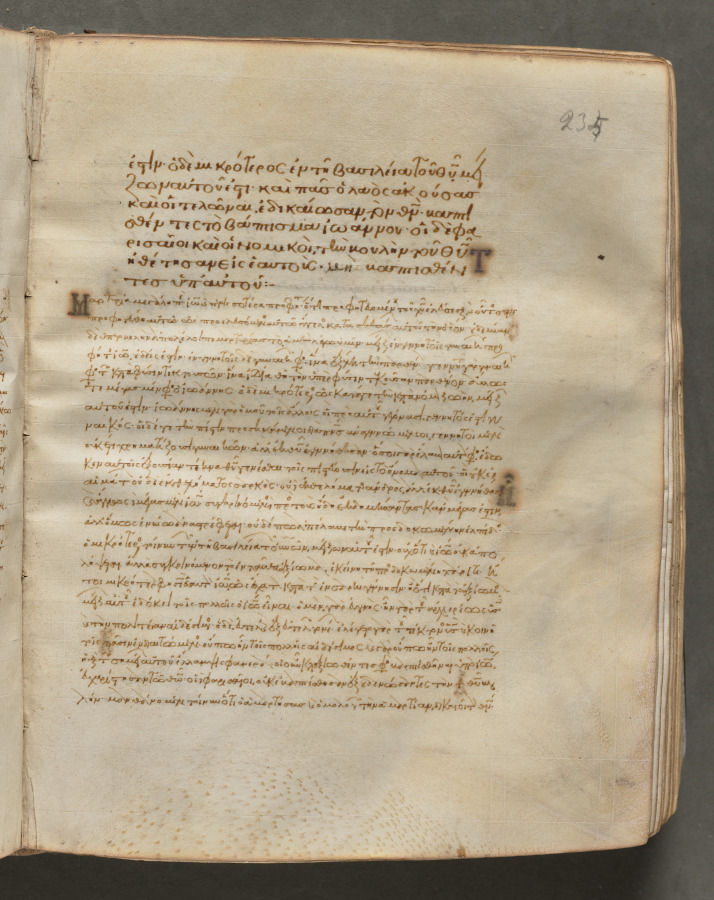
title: Text, folio 235 (recto), from a Gospel Book with Commentaries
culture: Byzantium, Constantinople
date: c. 1000–1100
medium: ink, tempera, and gold on vellum; leather binding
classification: Bound Volume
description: Each of the four gospels in this book opens on a page with brilliantly illuminated borders depicting the author of the text as well as birds—principally peacocks, symbols of the immortality of the soul—and fountains, representing the fountain of life and the salvation of the soul. This volume consists of 428 leaves with texts in Greek. Its level of sophistication suggests that it was probably written and decorated in a monastery in Constantinople.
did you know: Gospel books were carried in procession through Byzantine churches.